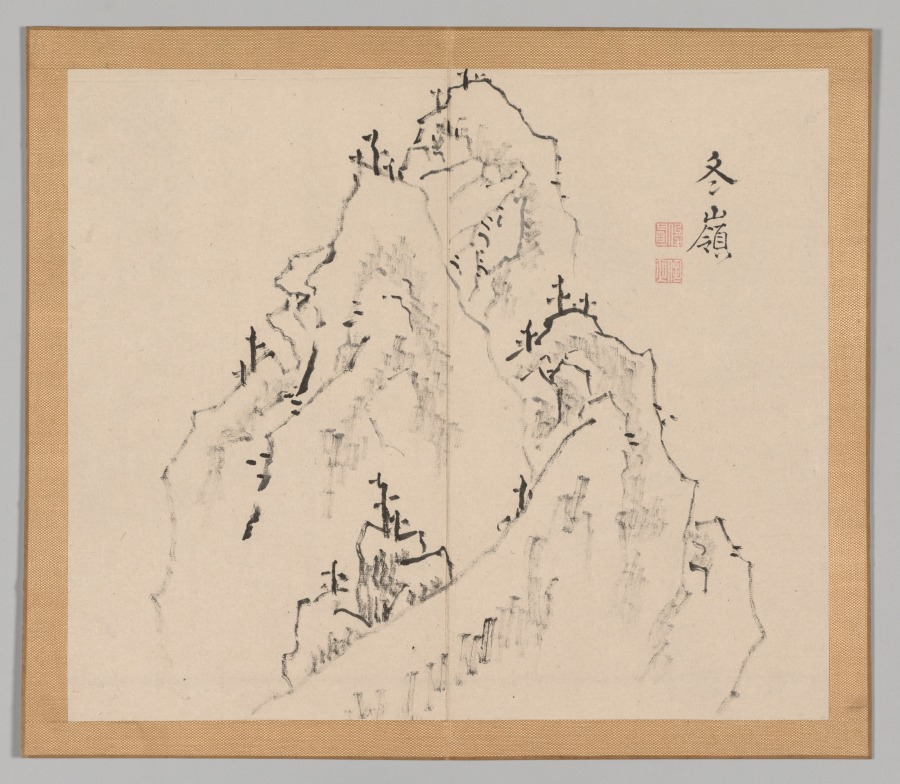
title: Reverberations of Taiga, Volume 1 (leaf 25)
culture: Japan, Edo period (1615–1868)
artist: Aoki Shukuya (Japanese, d. 1802)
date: mid- to late 1700s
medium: double-leaf from a pair of albums; ink and light color on paper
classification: Portfolio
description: Traditionally, young painters in Japan began their studies with an established master-painter. The master's compositions invariably became models that the apprentice copied to learn various ink and brush techniques. Shukuya was a pupil of the famous Kyoto artist Ikeno Taiga, whose style is reflected in these sketches of rocks, trees, and mountains.